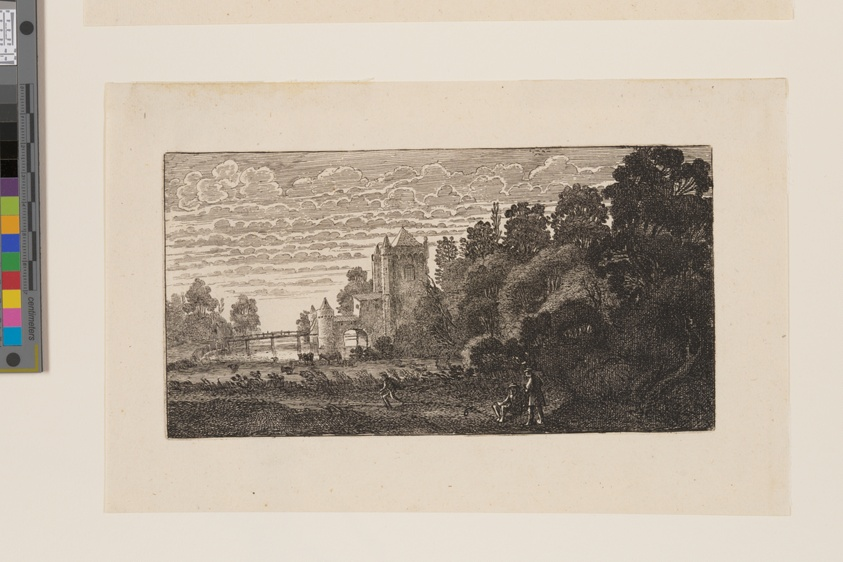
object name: Print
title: The ‘Spaernwouder’ or ‘Amsterdamsche Poort’ at Haarlem, from Six Landscapes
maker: Jan van de Velde II; Dutch, c. 1593–1641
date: c. 1613-1640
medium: Etching on ivory laid paper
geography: Netherlands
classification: etching; paper; print; prints and drawing